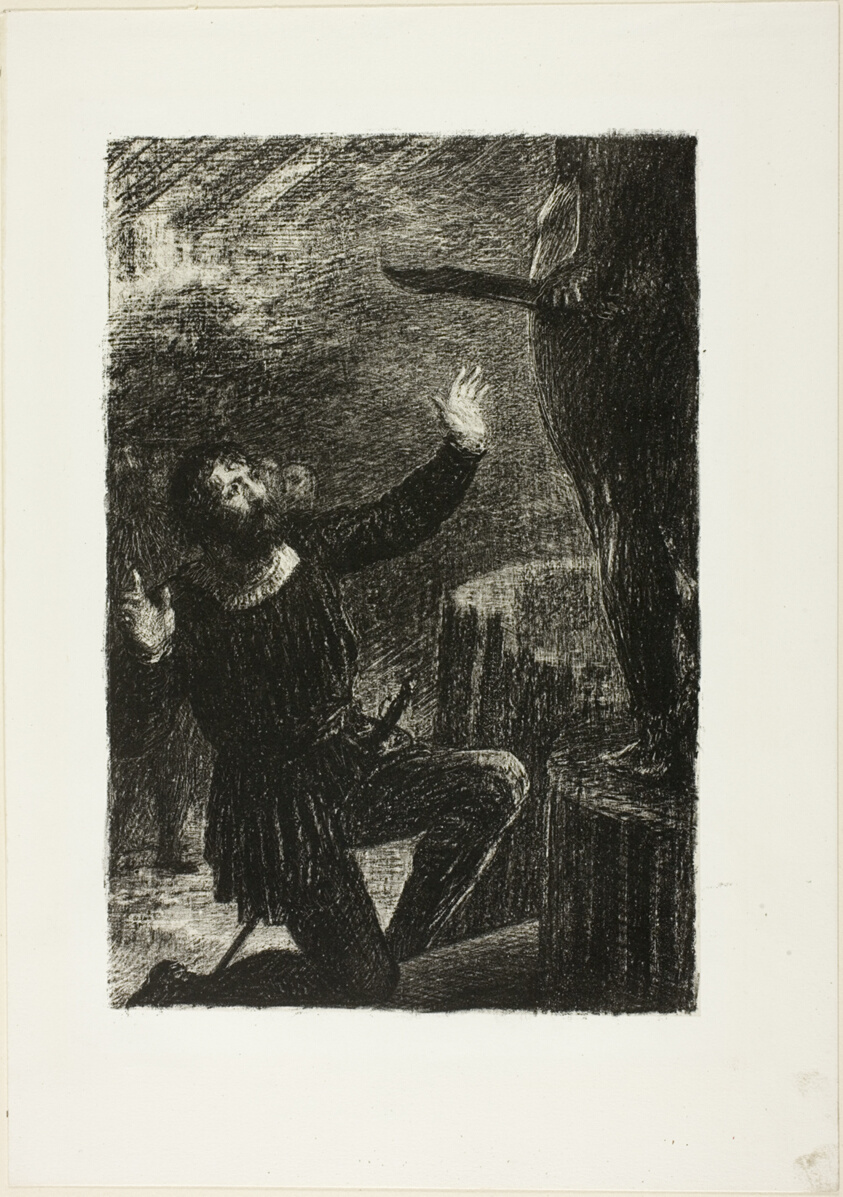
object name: Print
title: Benvenuto Cellini, Act III: The Casting of Perseus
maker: Henri Fantin-Latour (French, 1836-1904)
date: 1888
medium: Lithograph in black on ivory China paper laid down on white wove paper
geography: France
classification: lithograph; print; prints and drawing